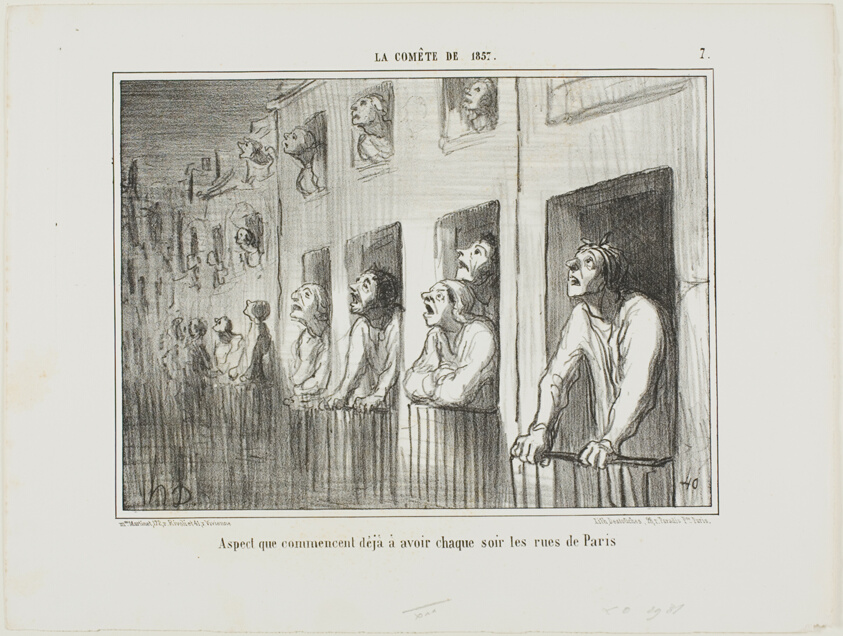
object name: Print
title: The streets of Paris are beginning to look like this every night, plate 7 from La Cométe De 1857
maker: Honoré Victorin Daumier; French, 1808-1879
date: 1857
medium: Lithograph in black on white wove paper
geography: France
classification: lithograph; print; prints and drawing